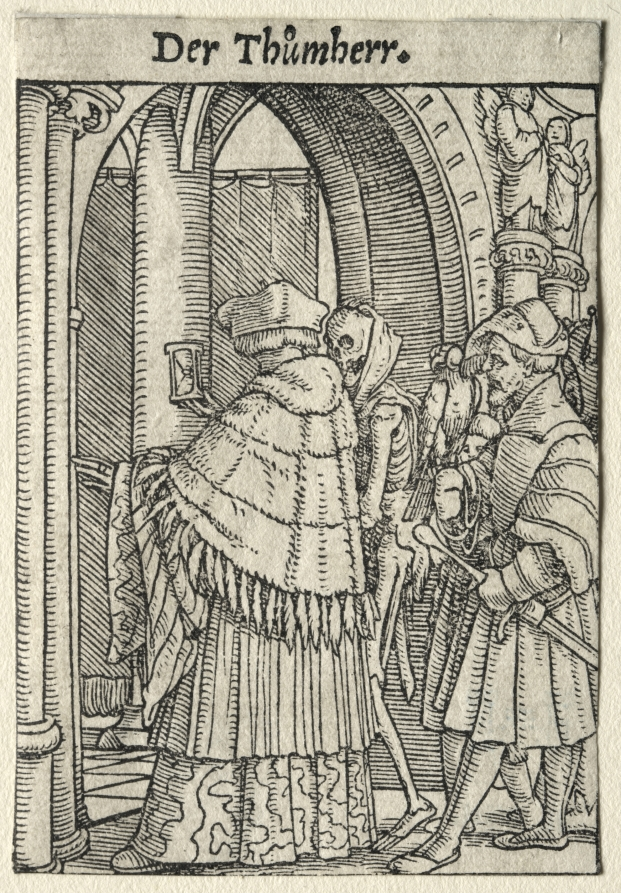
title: Dance of Death: The Canon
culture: Germany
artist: Hans Holbein the Younger (German, active England and Switzerland, 1497/98–1543)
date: ca. 1526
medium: woodcut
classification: Print